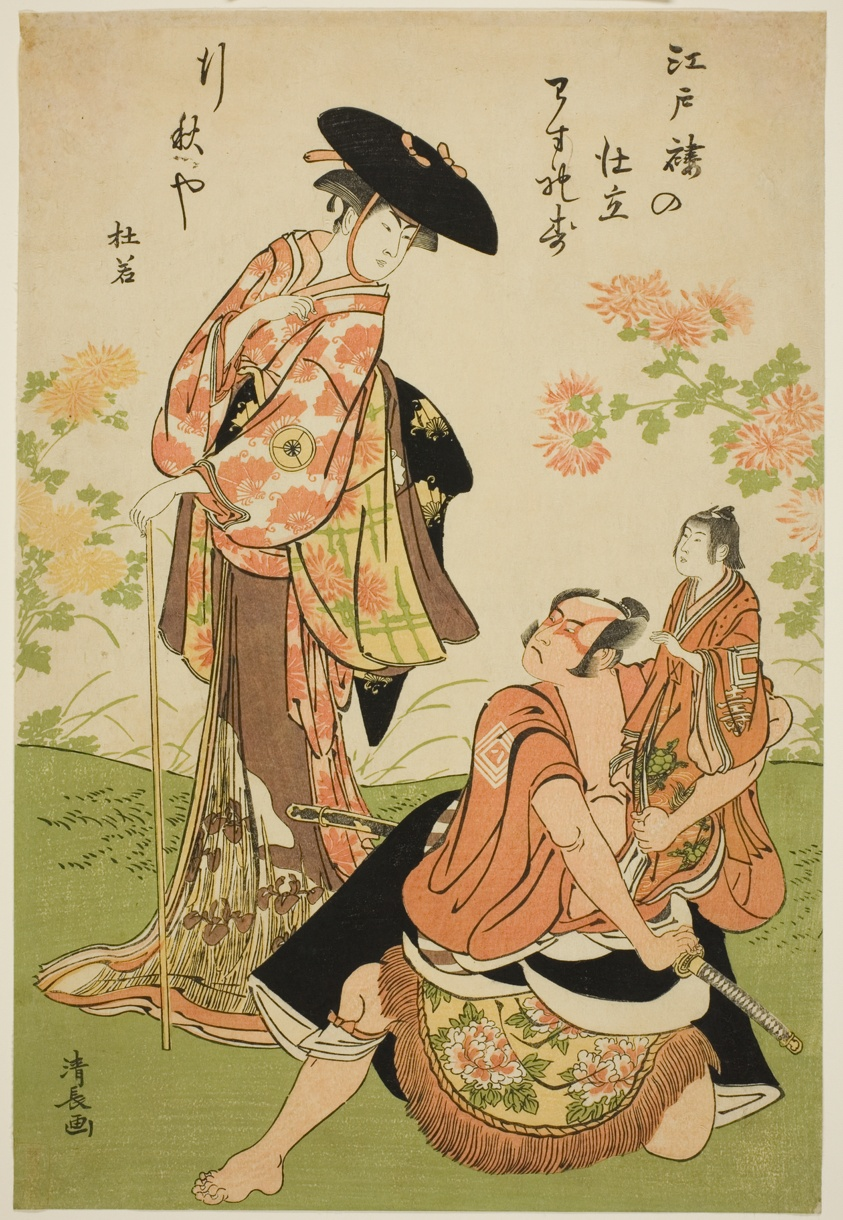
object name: Print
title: The Actors Iwai Hanshiro IV as Kuzunoha, Ichikawa Yaozo III as Yakanpei, and Ichikawa Ebizo IV as Abe no Doji, in the play "Ashiya Doman Ouchi Kagami," performed at the Nakamura Theater in the ninth month, 1784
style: Japanese (culture or style)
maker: Torii Kiyonaga (Japanese, 1752-1815)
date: 1784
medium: Color woodblock print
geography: Japan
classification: woodblock print; print; asian art